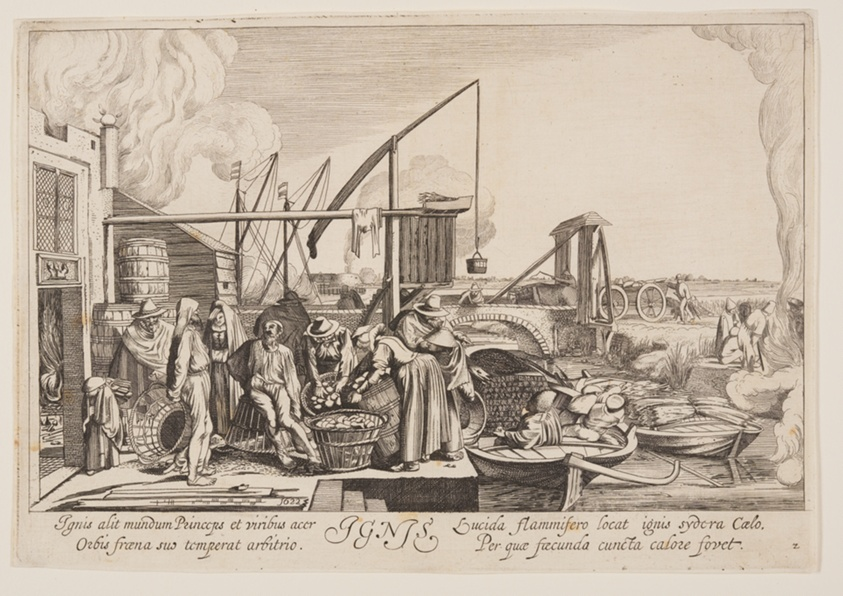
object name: Print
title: Fire, from The Four Elements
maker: Jan van de Velde II (Dutch, c. 1593–1641); after Willem Buytewech (Dutch, 1591/92-1624)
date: 1622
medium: Etching on ivory laid paper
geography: Netherlands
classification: print; paper; prints and drawing; etching